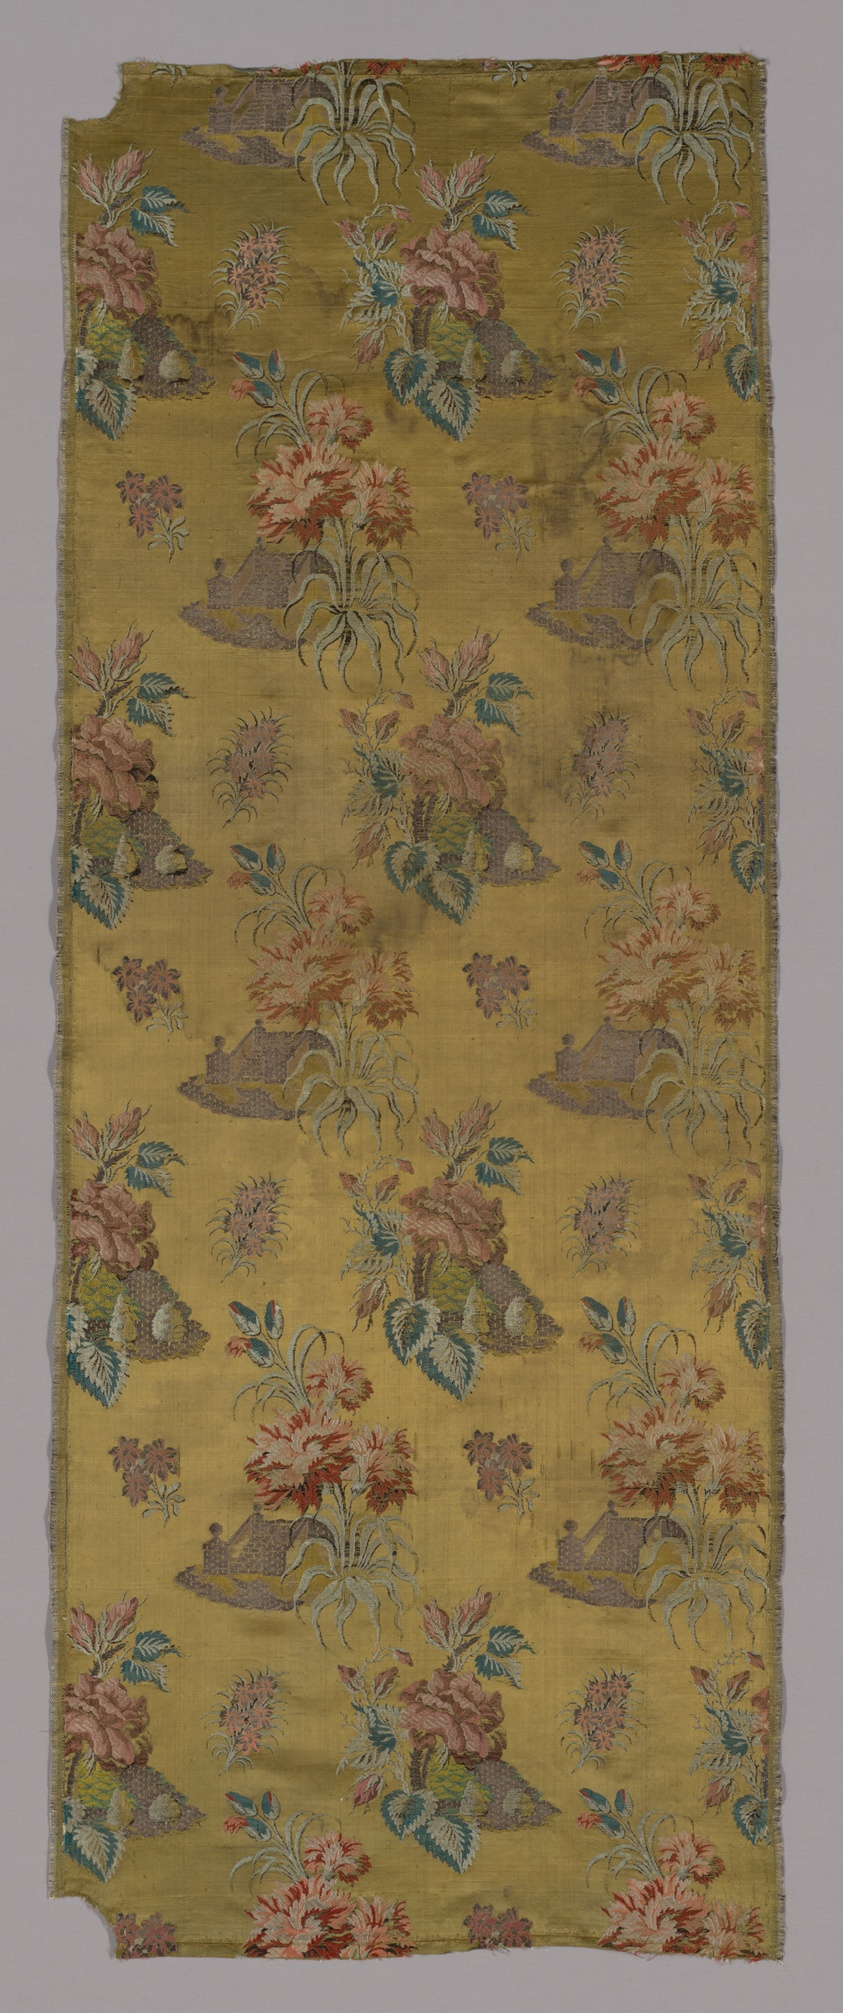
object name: Textile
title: Panel (Dress Fabric)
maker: France, probably Lyon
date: 1701/25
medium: Silk, satin; brocaded in silk and metal thread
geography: France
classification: textile; weaving